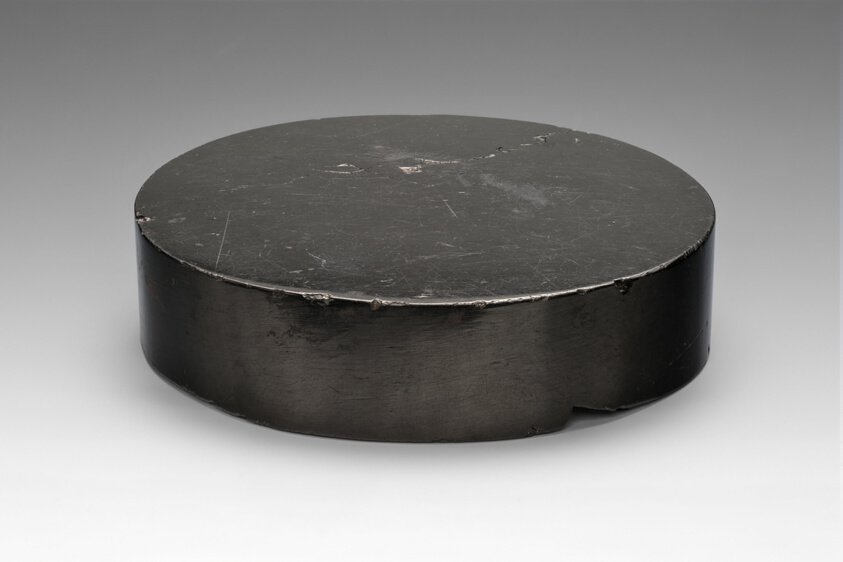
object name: Religious/Ritual Object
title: Divination Mirror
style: chavín horizon, cupisnique, early horizon, Pre-Columbian, americas, andes, Arts of the Americas, andean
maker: Chavín-Cupisnique; North coast, Peru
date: 900–600 BCE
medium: Anthracite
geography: Peruvian North Coast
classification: ritual objects; ceremonial object; art of the americas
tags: mirrors, ritual objects